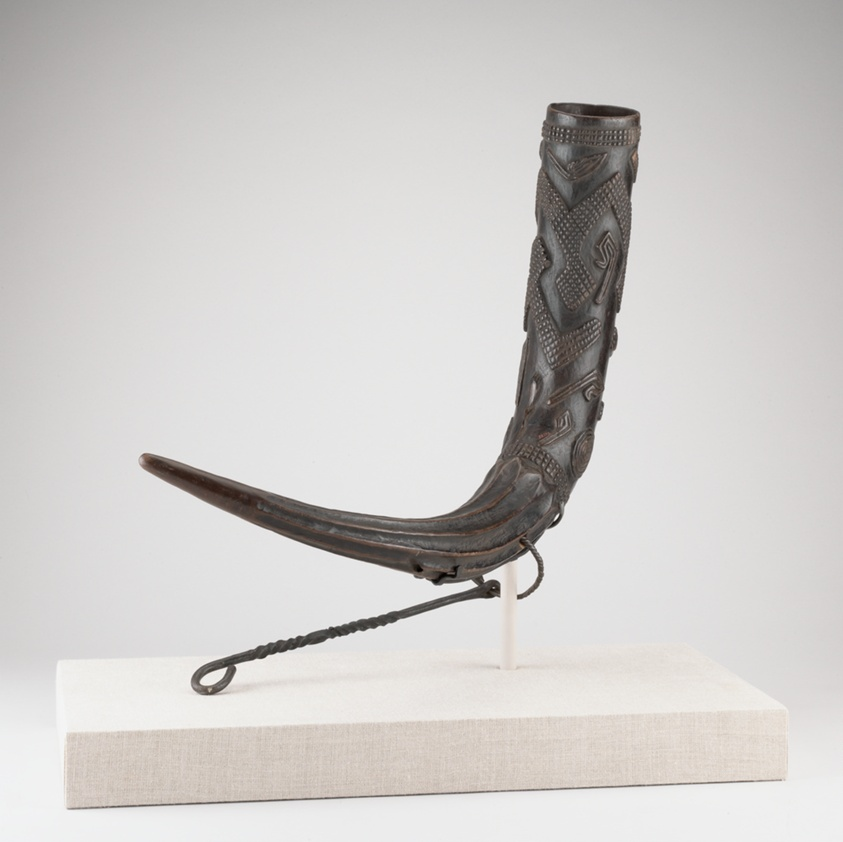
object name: Vessel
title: Horn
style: kuba (democratic republic of congo style, Arts of Africa, Central Africa, african Art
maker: Kuba; Kasai region, Democratic Republic of the Congo; Central Africa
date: Late 19th-early 20th century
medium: Wood, copper alloy, and iron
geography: Democratic Republic of the Congo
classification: drinking vessel; arts of Africa; vessel; african art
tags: drinking, animals, Buffalo, abstract figures, geometric, status